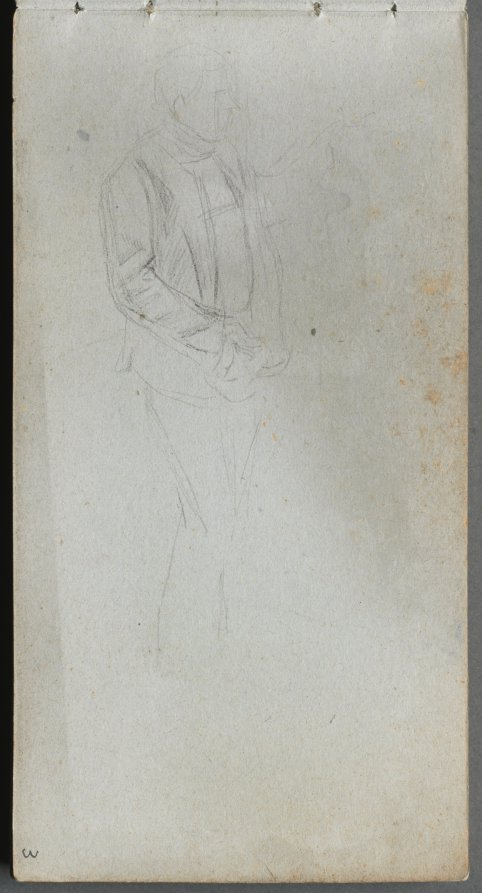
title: Sketchbook, page 3: Figure Study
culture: France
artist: Ernest Meissonier (French, 1815–1891)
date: c. 1860s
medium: graphite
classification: Bound Volume